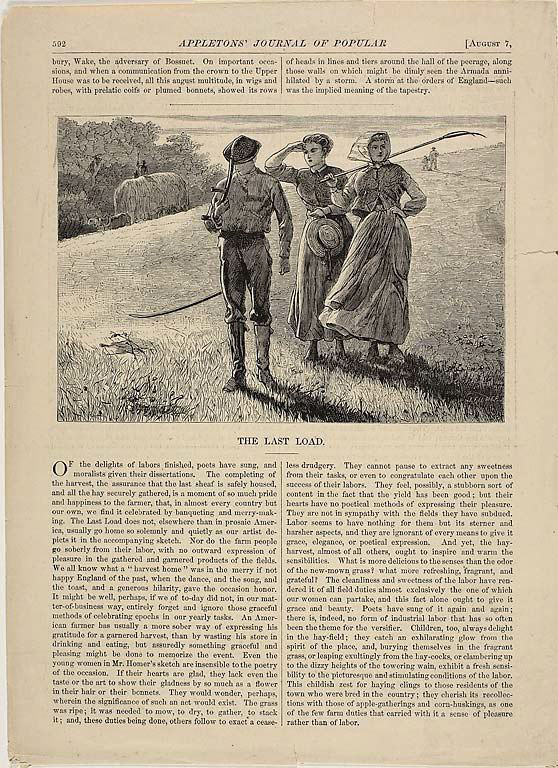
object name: Print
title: The Last Load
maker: Winslow Homer (American, 1836-1910); published by Appletons' Journal (American, 1869-1881)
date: published August 7, 1869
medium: Wood engraving on paper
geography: United States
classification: wood engraving; print; prints and drawing